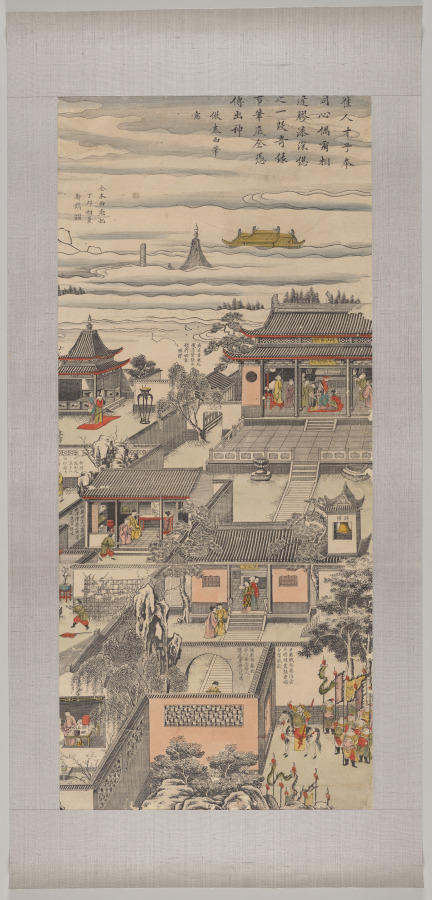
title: First Part of Story of The Western Chamber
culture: China, Qing dynasty (1644–1911), Qianlong reign (1736–95)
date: 1736–95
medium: Polychrome woodblock print; ink and color on paper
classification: Print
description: In the 1600s, printing flourished in such Jiangnan cities as Nanjing, Suzhou, Hangzhou, and Huizhou, evolving from privately enjoyed illustrated books printed in color to more commercialized single-sheet color prints that were hung on walls and became part of the rich urban visual culture.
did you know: Woodblock printing in color reached a height in China in the 1600s to 1700s. The prints were executed by means of sets of separate blocks, each carved to print a different color.